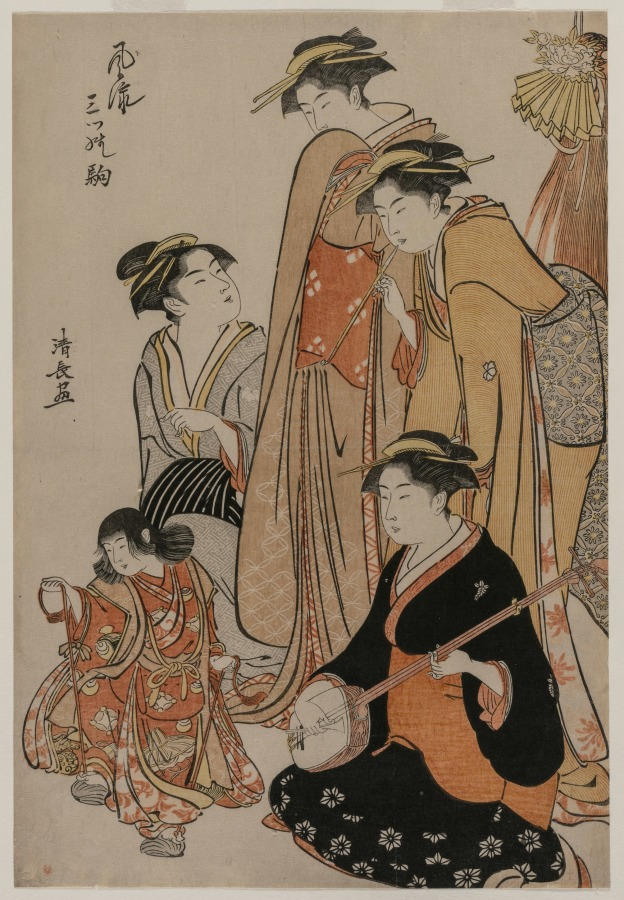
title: Women Watching a Girl Dance on Shells (From the series Fashionable Presentations of Three Horses)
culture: Japan, Edo period (1615–1868)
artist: Torii Kiyonaga (Japanese, 1752–1815)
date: 1784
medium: color woodblock print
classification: Print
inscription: Signature: Kiyonaga ga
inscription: Collector's seal: Vever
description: Dancing plays a significant role in festival celebrations and special occasions. The young girl is dancing on a pair of bivalve shells (also used as game pieces in other amusements), accompanied by the music of the samisen (3-stringed guitar).